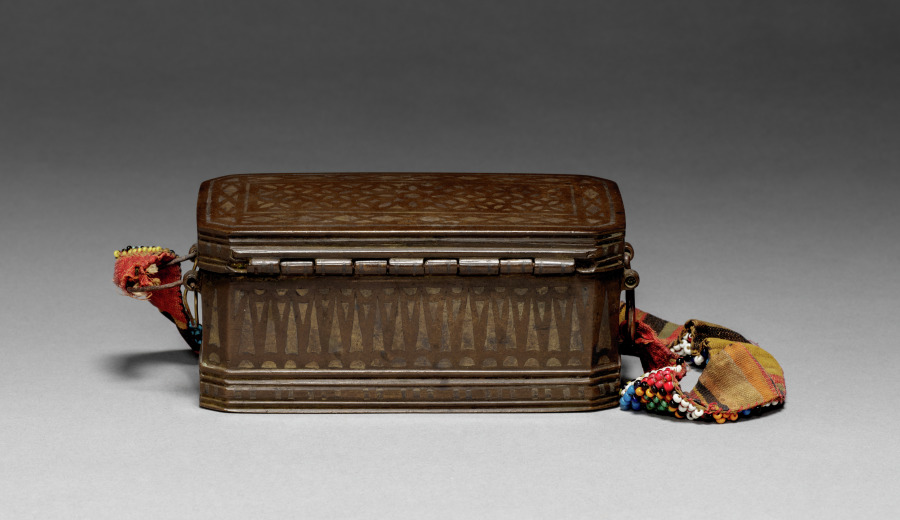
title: Betel nut container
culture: Philippines, Mindanao, most likely Maranao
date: 1800s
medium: Cast brass with silver inlays, weave fabric (handle), glass beads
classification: Arms and Armor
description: Chewing betel has been a social ritual common throughout Southeast Asia and Oceania for centuries. This betel nut container held the ingredients (areca nut, slaked lime, and betel leaves) used for this practice. The rectangular box, made of cast brass, is richly decorated with inlaid silver geometric motifs. It features a multicolored beaded strap with a pattern typical of the Bagobo people.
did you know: The beaded strap suggests portability; it may have been worn or suspended during social gatherings.